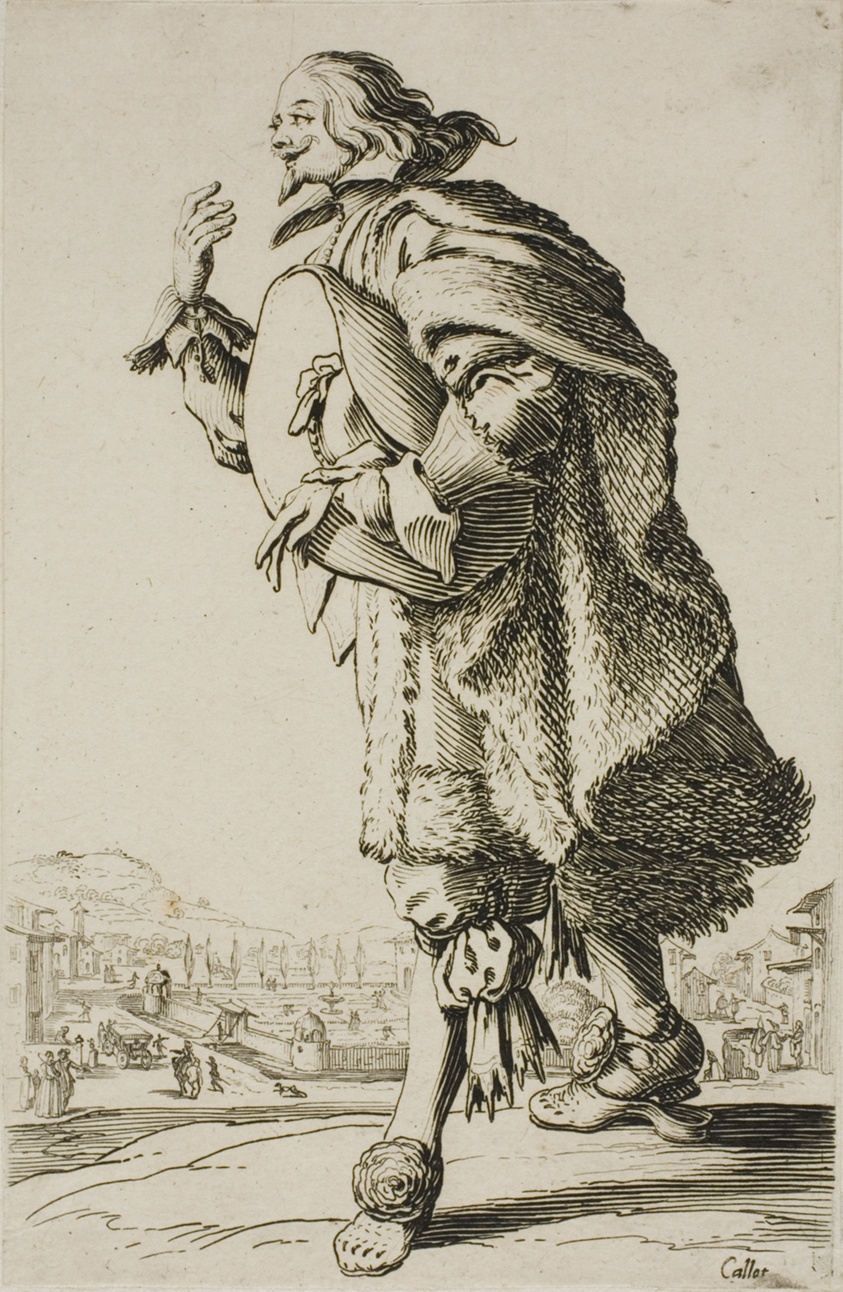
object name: Print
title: The Genleman who Salutes While Holding his Hat Beneath his Arm, plate two from La Noblesse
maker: Jacques Callot (French, 1592-1635)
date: c. 1625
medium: Etching on paper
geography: France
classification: etching; print; prints and drawing